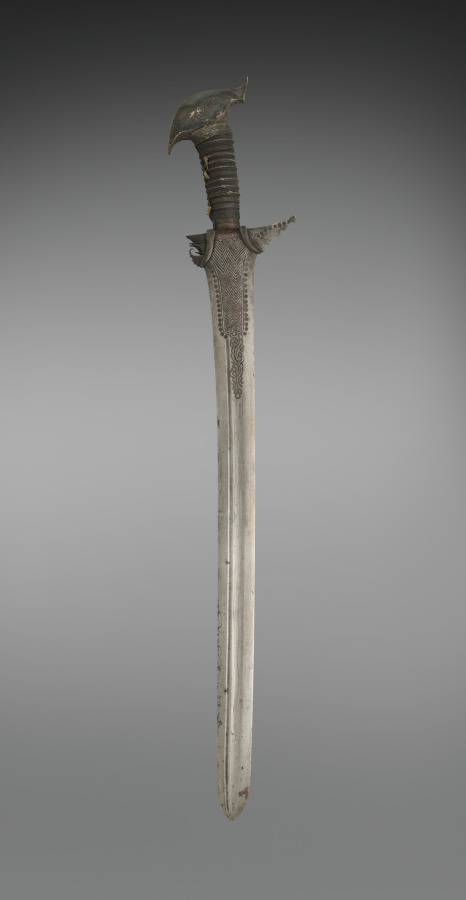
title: Sword (Kalis or Sundang)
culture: Philippines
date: before 1916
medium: Blade: metal with brass inlay; grip: cord; pommel: silver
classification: Arms and Armor